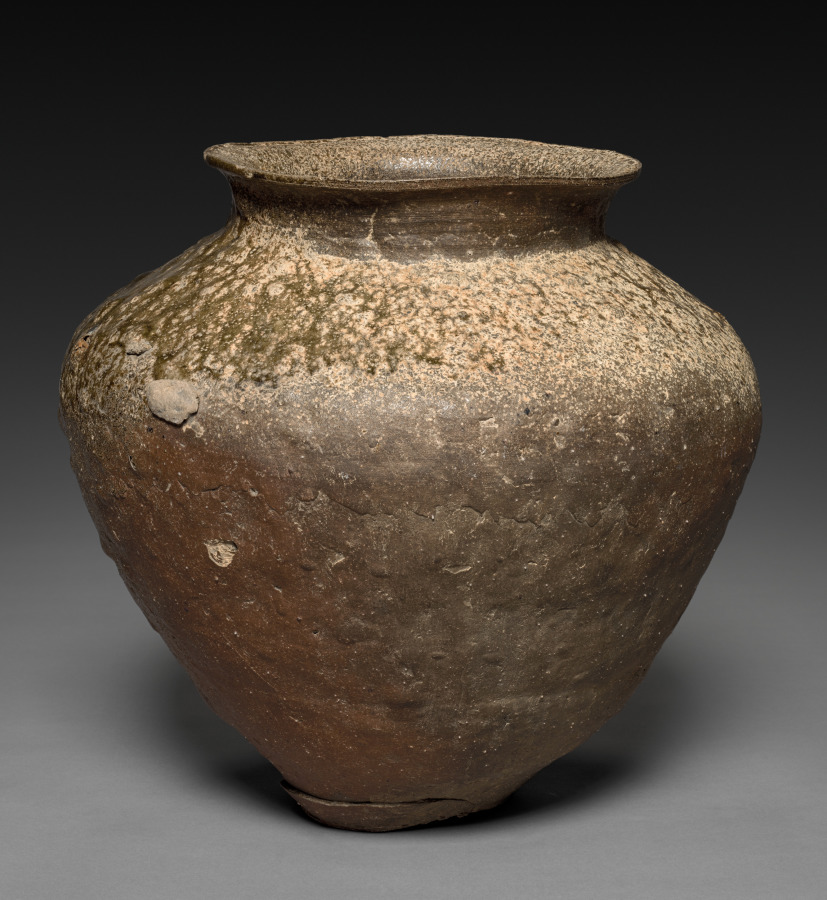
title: Storage Jar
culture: Japan, Kamakura period (1185–1333)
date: late 1100s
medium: Stoneware with natural ash glaze (Tokoname ware)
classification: Ceramic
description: Tokoname, located on Ise Bay in present-day Aichi prefecture on Japan’s main island, Honshu, was the largest center of ceramic production in medieval Japan. It had been an active center of ceramic production since the Heian period (794–1185). Wide-mouthed jars like this one are called kame, and were favored for use in tea practice.